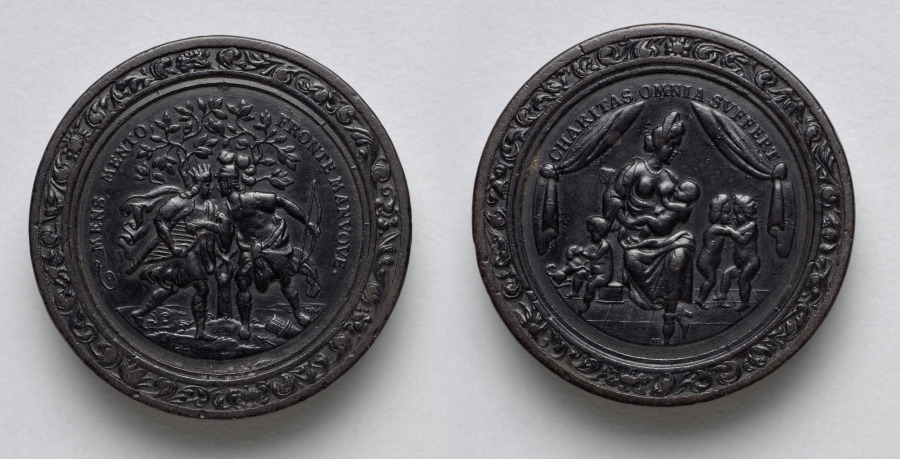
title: Gaming Piece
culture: Germany, late 17th-early 18th Century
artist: Martin Brunner (German, 1659–1725)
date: c.1700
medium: wood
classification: Furniture and woodwork